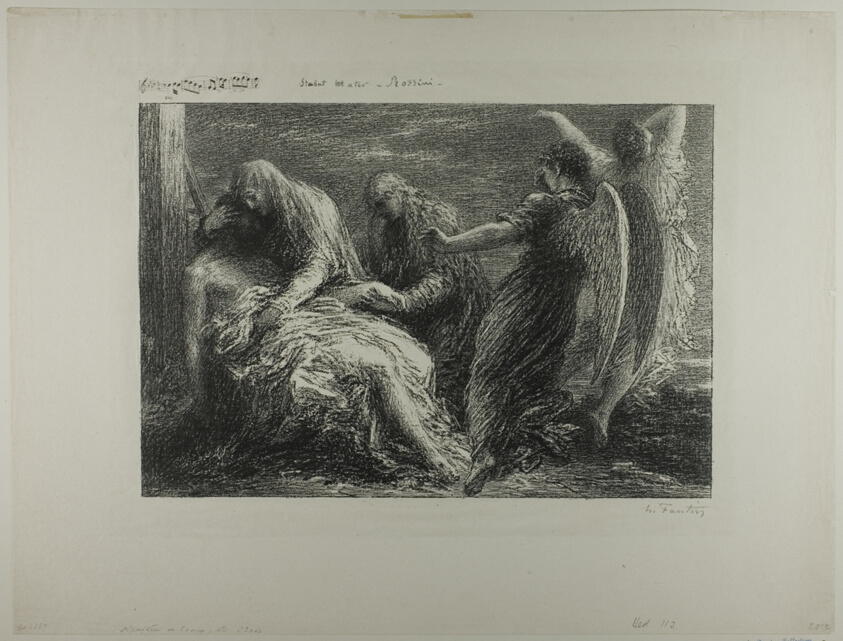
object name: Print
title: Deposition from the Cross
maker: Henri Fantin-Latour (French, 1836-1904)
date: 1893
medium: Lithograph in black on ivory chine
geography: France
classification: lithograph; print; prints and drawing